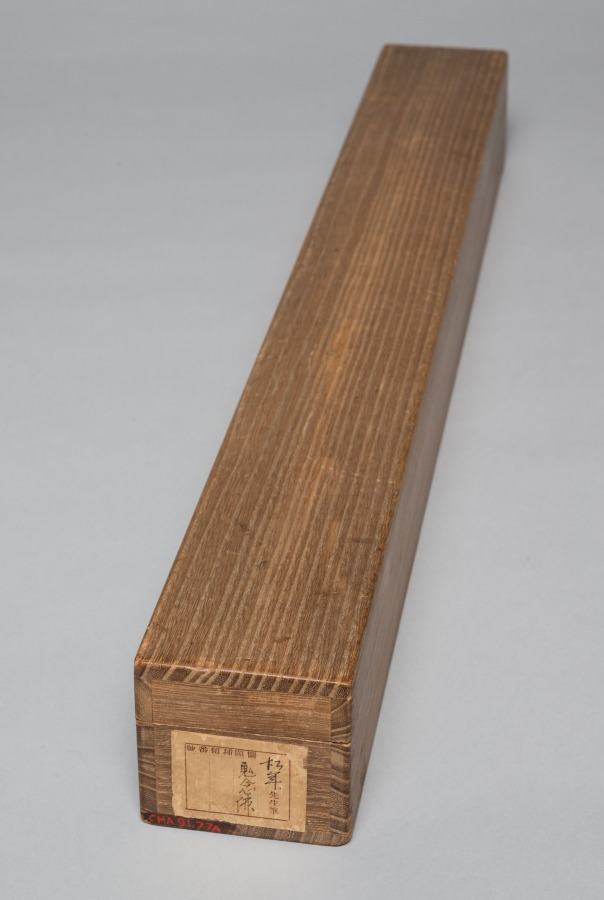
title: Demon Intoning the Name of the Buddha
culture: Japan, Meiji period (1868–1912)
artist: Suzuki Shōnen (Japanese, 1849–1918)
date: late 1800s–early 1900s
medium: hanging scroll; ink and color on silk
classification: Painting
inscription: artist's inscription, signature, and seal upper left.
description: Among the subjects of souvenir paintings made since the 1600s in Ōtsu, a travel hub near Kyoto in western Japan, was a demon in monk’s robes reciting the name of the Buddha Amida to the rhythm of his gong. Ōtsu paintings largely disappeared with the advent of rail travel in the late 1800s, as people no longer stopped in the area. In this work, Kyoto-based artist Suzuki Shōnen reimagined the demon for the modern era—the simple figure from the Ōtsu painting is transformed into a realistic one accompanied by a calligraphic meditation on its nature.